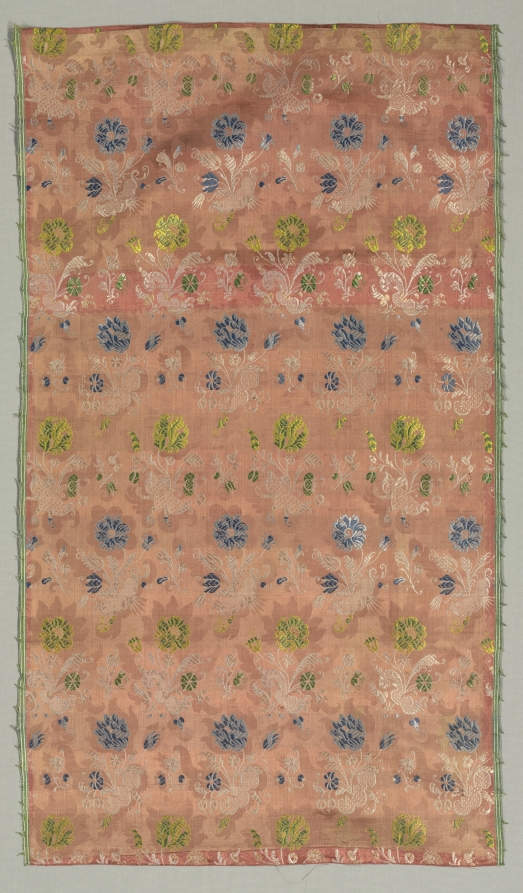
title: Silk Fragment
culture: Spain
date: 1700s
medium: fancy compound satin weave: silk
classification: Textile